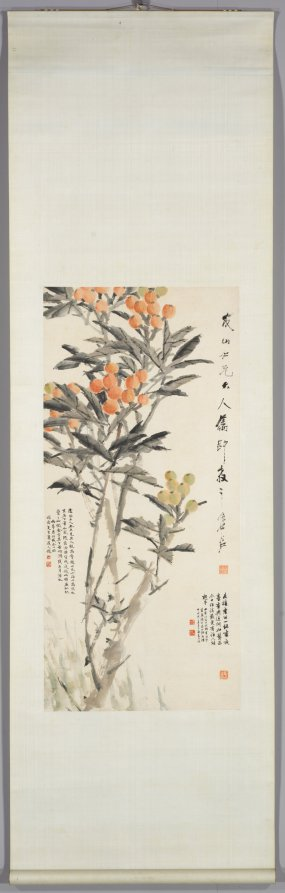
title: Pipa (Loquats)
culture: China, Yangzhou, Qing dynasty (1644-1911)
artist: Xugu (Chinese, 1823–1896)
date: c. 1888–89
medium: Hanging scroll; ink and color on paper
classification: Painting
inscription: 友山仁兄大人屬即教之，虛谷. [印]虛谷書畫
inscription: 未接虛公一經書2，夜臺畫興近何如。/ 聾丞今日狂談藝，更有誰人能起予。 雨亭以友山所貽虛谷和上畫屬，题於泰山殘石樓中，戊戌三日二十日，高邕并記。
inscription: 虚谷上人，余未見其人。觀高聾題大氏，亦海上高流也。其畫下筆如風，隨意涂抹，皆成逸趣。此幀畫枇杷纍纍如缀金，坐其下若咽洞庭五月涼也！ 雨亭君所藏，今以貽頌周先生。清道人題。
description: The loquat is a plant native to China that produces a juicy, yellow fruit in early summer. The artist may have intentionally extended the branches beyond the paper to emphasize the abundance of fruit. Xugu’s subjects of flowers, goldfish, and loquats express wishes for abundance and wealth, and must have appealed to his patrons. Xugu gave up his career as a military official during the Taiping rebellion (1850–64) and became an itinerant monk who painted for a living. He spent the later years of his life in Shanghai and his fame as an artist is associated with that city.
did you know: Xugu inscribed his painting on the right, dedicating it to a Mr. Youshan. Two additional inscriptions by other writers were added later, each time the painting changed owners.